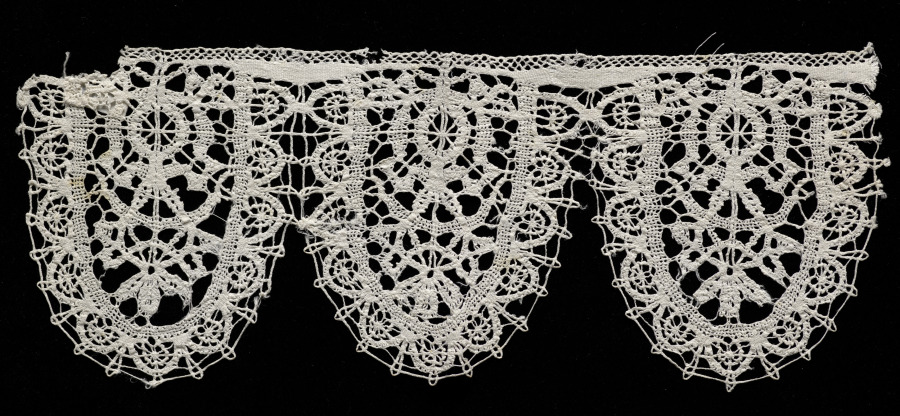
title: Lace Edging of Round Points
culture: Italy, Genoa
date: 1600s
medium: Bobbin lace (light Genoese rose lace)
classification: Lace